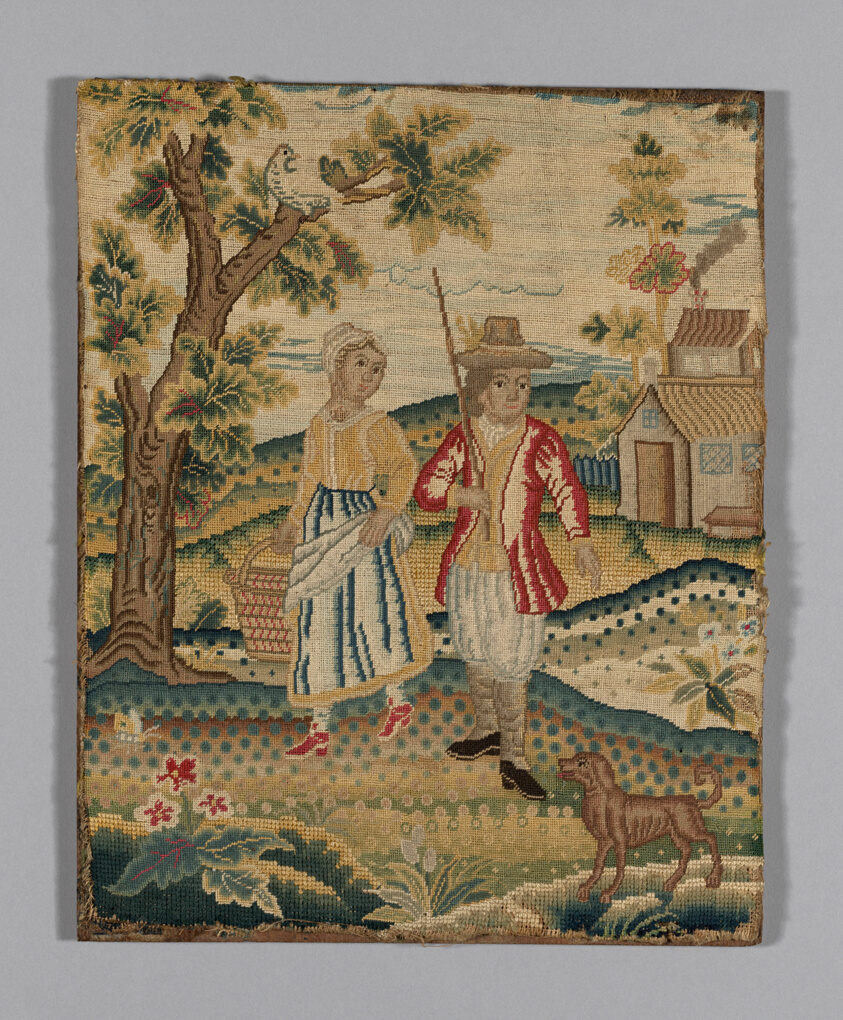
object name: Textile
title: Picture (Needlework)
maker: England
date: c. 1720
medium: Linen, plain weave; embroidered with wool yarns and silk floss in cross, diagonal tent and tent stitches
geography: England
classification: textile; needlework (visual works)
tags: people, circles, trees